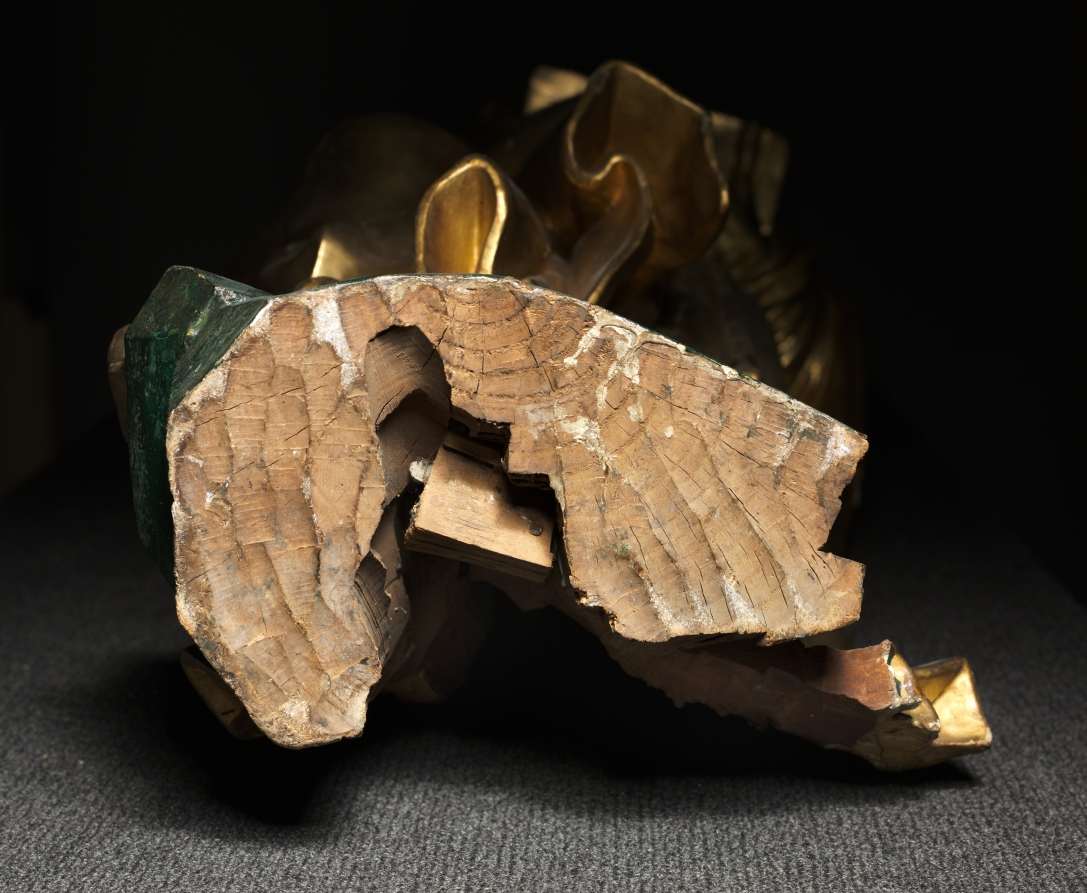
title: Saint Joachim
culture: Germany, 18th century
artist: Joseph Anton Feuchtmayer (German, 1696–1770)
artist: or Circle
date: c. 1760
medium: gilded wood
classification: Sculpture